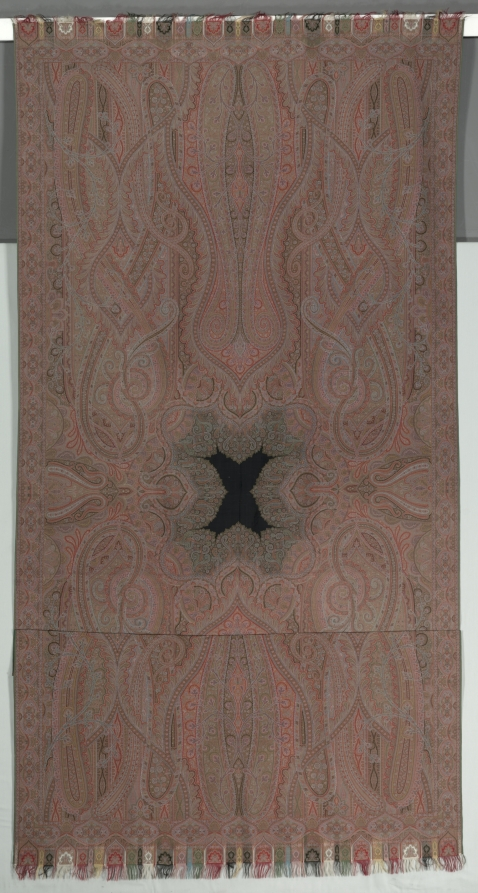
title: Long Shawl with Large Symmetrical Botehs and Small Black Center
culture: France, Paris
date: 1855–62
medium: silk?; supplementary weft pattern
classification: Textile